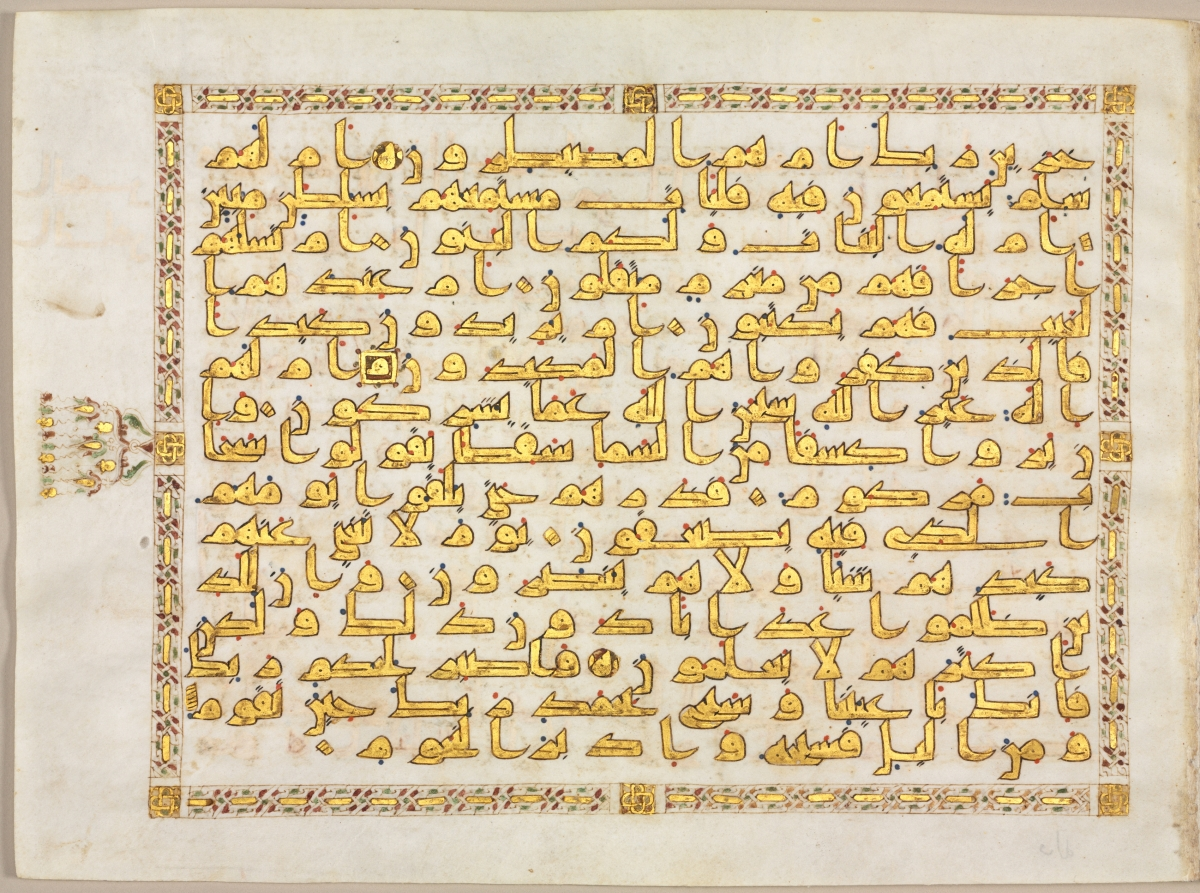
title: Page from a Qur'an (recto)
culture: North Africa, Aghlabid or Abbasid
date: 800s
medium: gold, ink and colors on parchment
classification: Manuscript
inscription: Sura al-Tur (52: part 37-49). Script: Kufi (fifteen lines to a page)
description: Because of its connection with the Qur'an, calligraphy was elevated above all other art forms in the Islamic world. From an awkward and nearly illegible form of writing, Arabic script was transformed during the 600s and 700s to make it worthy of recording the Divine word. By the 800s, Muslim scribes were producing copies of the Qur'an that were true calligraphic masterpieces. This Qur'an, written entirely in gold, exemplifies the angular form of writing known as Kufic at its majestic best. The text on the right page is the opening of the Chapter of the Star (53:1–21), which begins: “By the star when it plunges, your comrade is not astray, neither errs, nor speaks he out of caprice. This is naught but a revelation revealed, taught him by one terrible in power, very strong. . . . ”